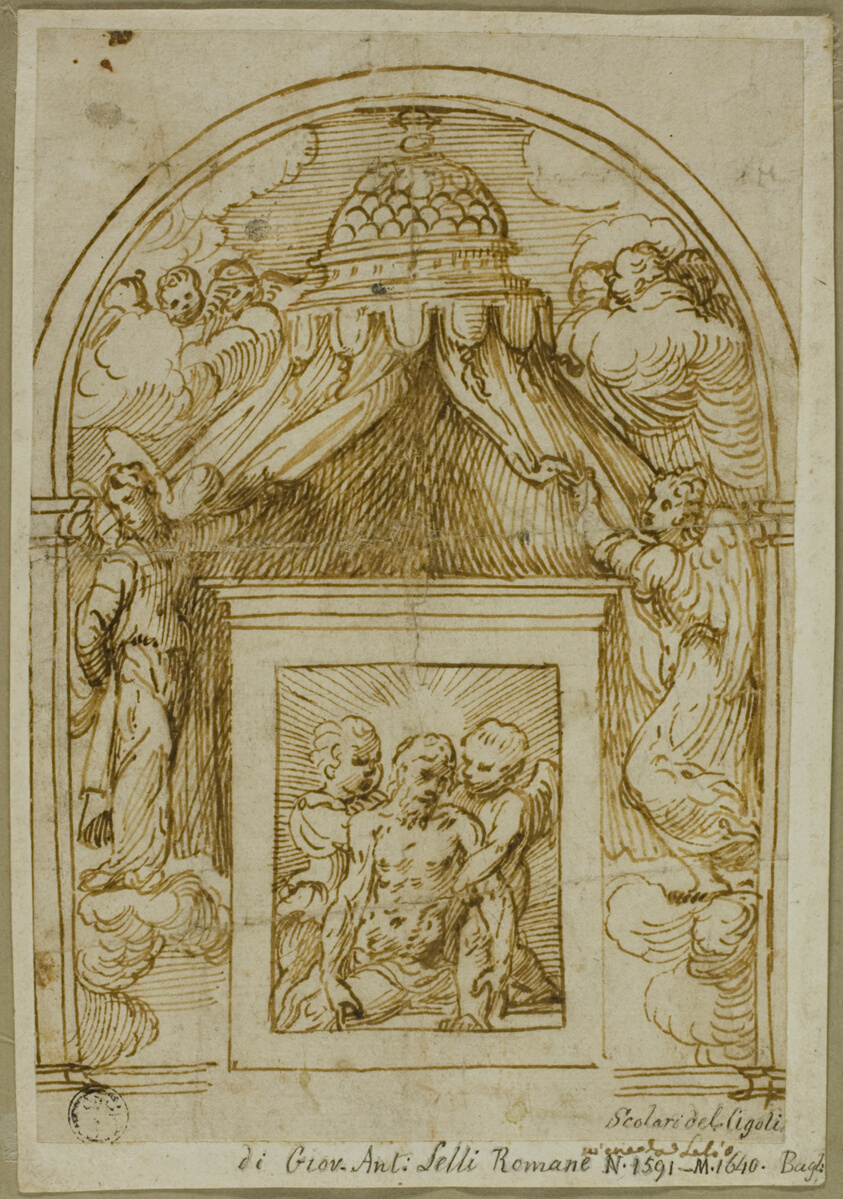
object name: Drawing and Watercolor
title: Tabernacle with Man of Sorrows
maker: Circle of Domenico Campagnola; Italian, c. 1500-1564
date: c. 1535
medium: Pen and brown ink on ivory laid paper, laid down on ivory wove paper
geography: Italy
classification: pen and ink drawings; drawings (visual works); prints and drawing